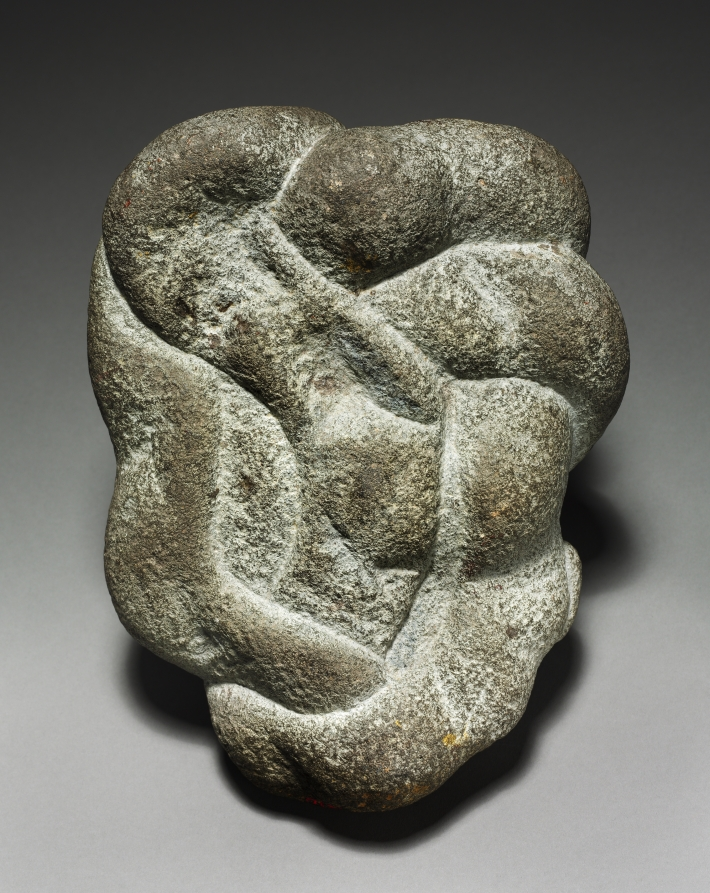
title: Coiled Rattlesnake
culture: Central Mexico, Aztec, 13th-16th century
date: c. 1200–1519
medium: stone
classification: Sculpture